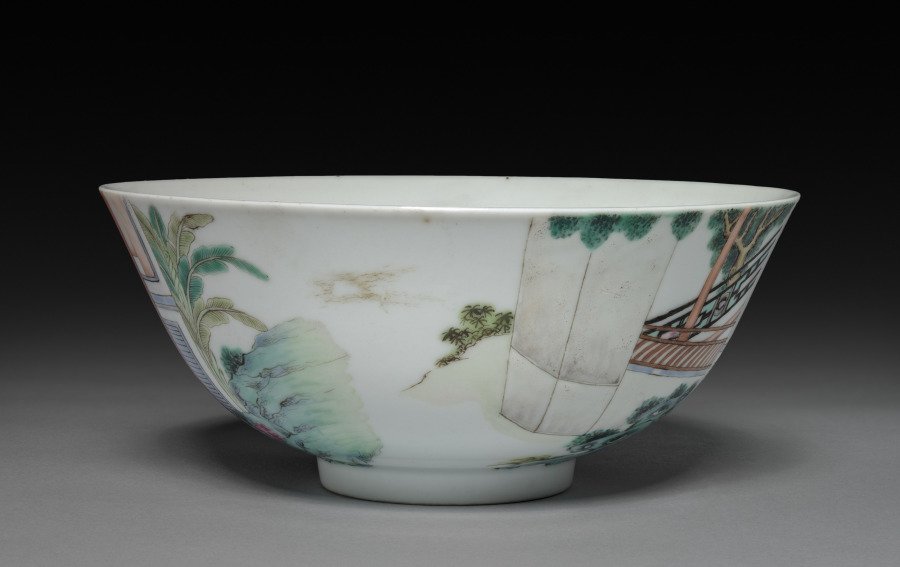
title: Five-color Bowl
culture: China, Qing dynasty (1644-1911), Daoguang reign (1821-1850)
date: 1821–1850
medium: porcelain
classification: Ceramic